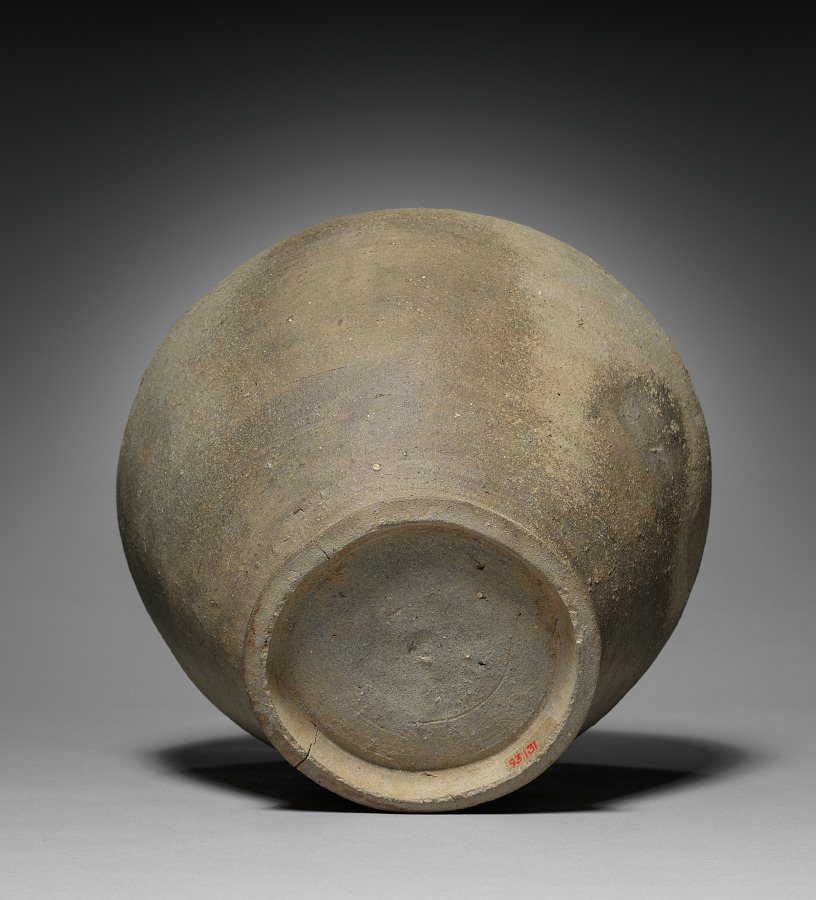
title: Cinerary Urn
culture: Japan, Heian period (794–1185)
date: c. 800–850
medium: stoneware with slight natural ash glaze (Sue ware)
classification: Ceramic